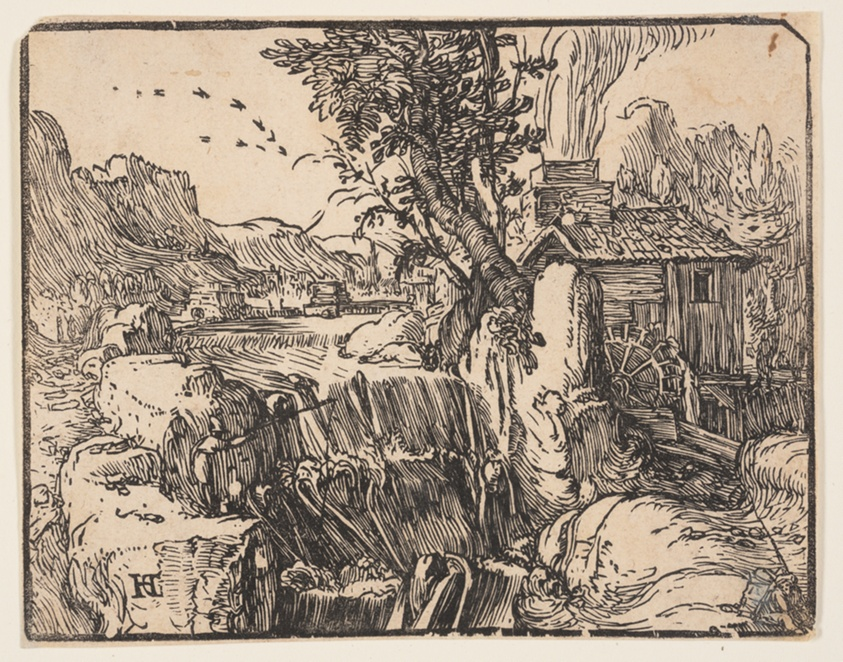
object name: Print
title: Landscape with a Waterfall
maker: Hendrick Goltzius (Dutch, 1558–1617)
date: c. 1600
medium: Woodcut printed in black on cream laid paper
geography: Netherlands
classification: woodcut; paper; print; prints and drawing